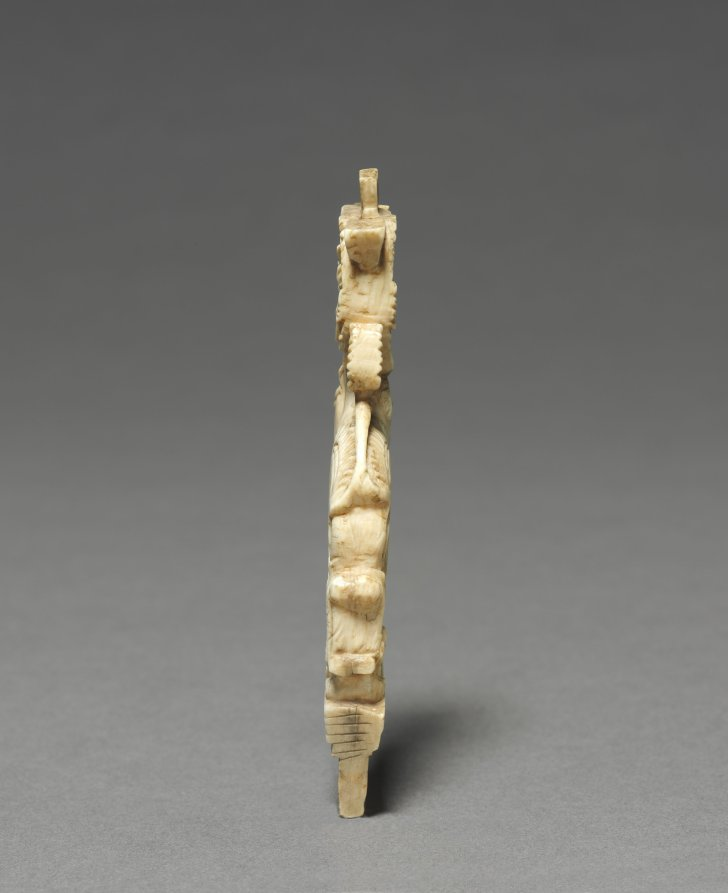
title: Carved Bracket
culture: South India, probably Madurai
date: 1600s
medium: Ivory with traces of pigment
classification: Ivory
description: Composite creatures with the body of a lion, tusks and trunk of an elephant, and horns of an antelope are standard elements of medieval Indian architecture and furniture. Traces of pigment indicate that these ivory furniture facings were brightly painted.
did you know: These creatures stand for shakti, or creative energy.